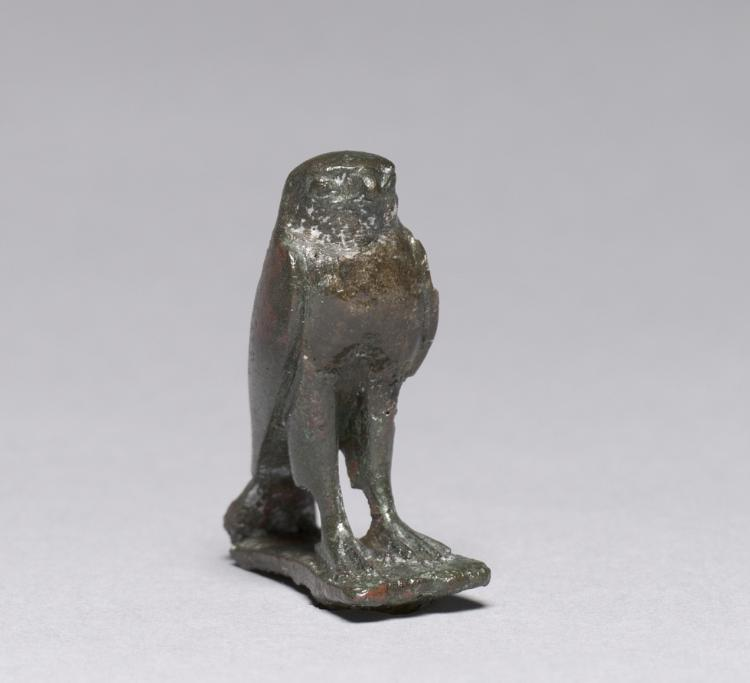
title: Horus Falcon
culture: Egypt, Late period (715–332 BCE), Dynasty 26 or later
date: 664–30 BCE OR 664–330 BCE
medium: bronze, solid cast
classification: Sculpture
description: The falcon stands in hieroglyphic form—body erect, feet together—on a thin, oblong base with a tang beneath. The eye and beak are the only areas with incised details. Numerous such images of this important bird, an age-old symbol of Egyptian kingship, survive.